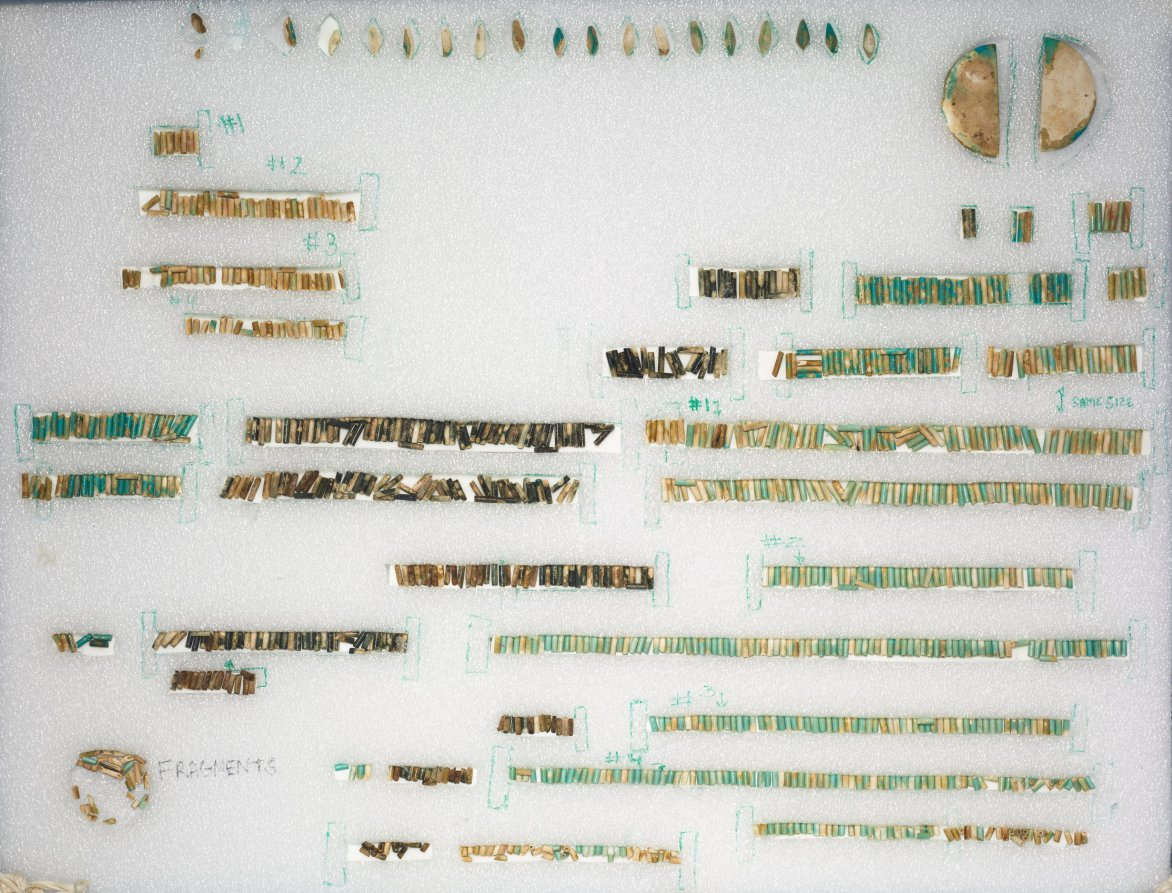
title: Loose Beads and Two Terminals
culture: Egypt, Middle Kingdom (2040–1648 BCE)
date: 1980–1801 BCE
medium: faience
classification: Jewelry